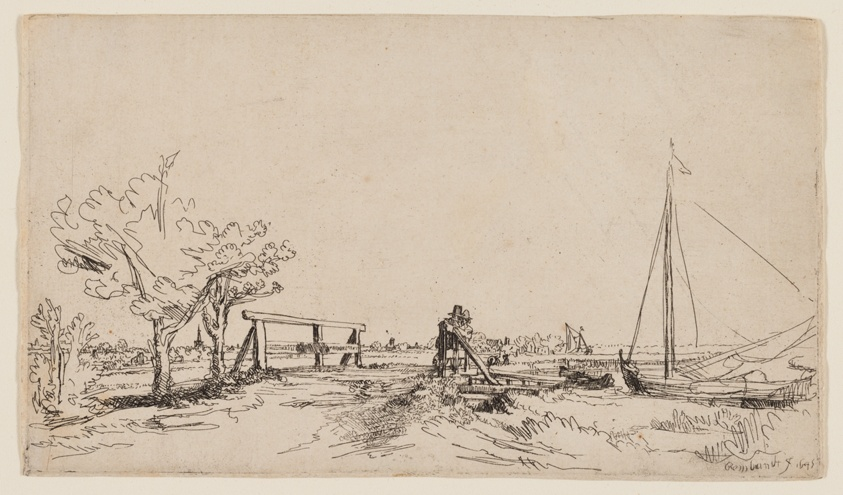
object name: Print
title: The Bridge at Klein Kostverloren on the Amstel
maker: Rembrandt van Rijn (Dutch, 1606-1669)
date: 1645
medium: Etching on ivory laid paper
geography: Holland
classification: etching; print; prints and drawing; paper